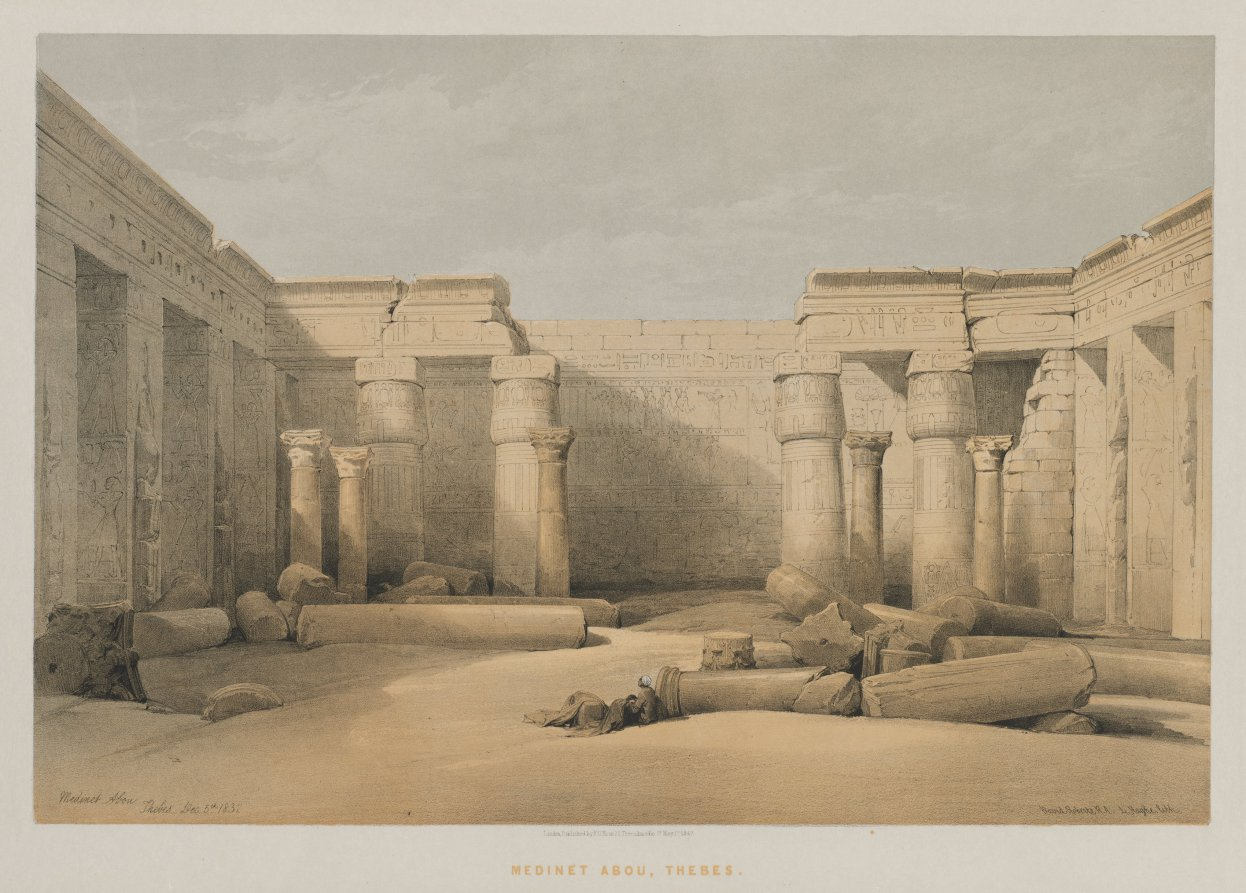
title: Egypt and Nubia, Volume II: Medinet Abou, Thebes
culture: England, 19th century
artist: Louis Haghe (British, 1806–1885)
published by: F. G. Moon, 20 Threadneedle Street, London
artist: after David Roberts (Scottish, 1796–1864)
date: 1847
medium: color lithograph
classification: Print